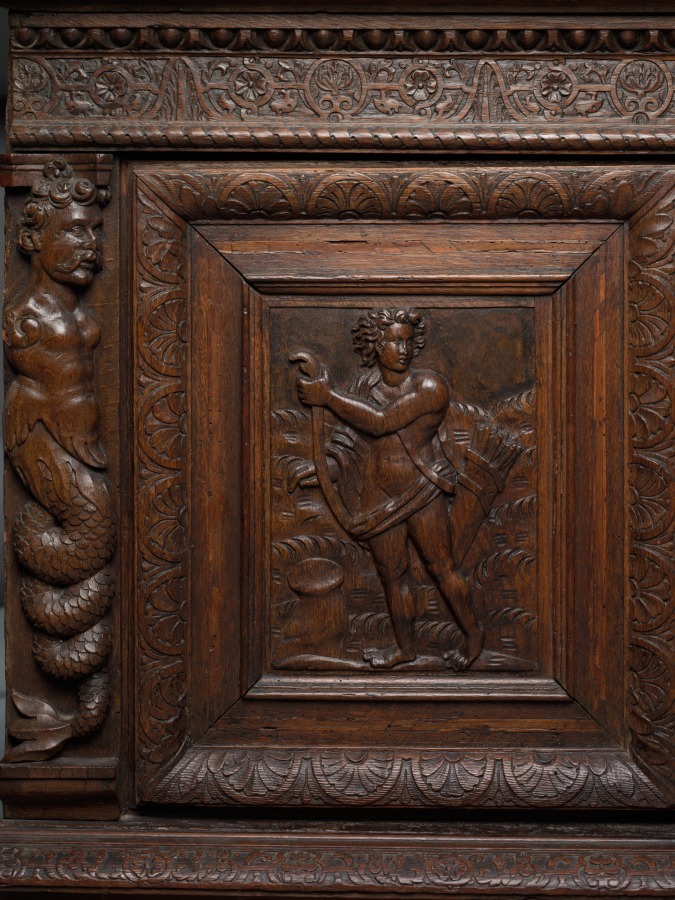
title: Chest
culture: France, Normandy, 16th century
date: 1550–1599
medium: oak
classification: Furniture and woodwork